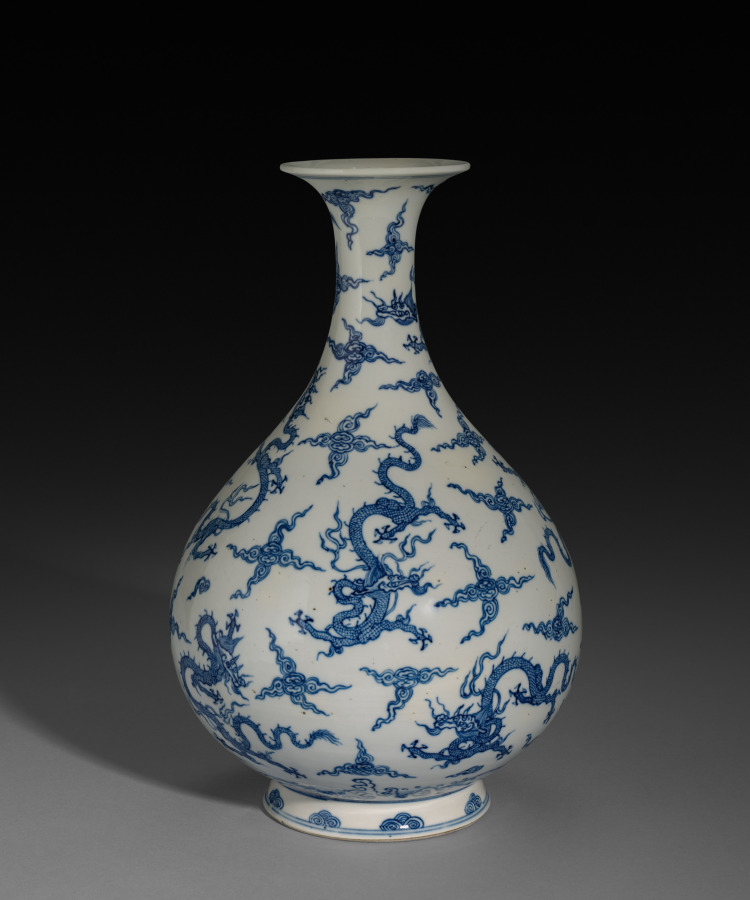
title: Bottle Vase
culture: China, Jiangxi province, Jingdezhen kilns, Qing dynasty (1644-1911), Yongzheng reign (1723-35)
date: 1723–35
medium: porcelain with underglaze blue decoration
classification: Ceramic